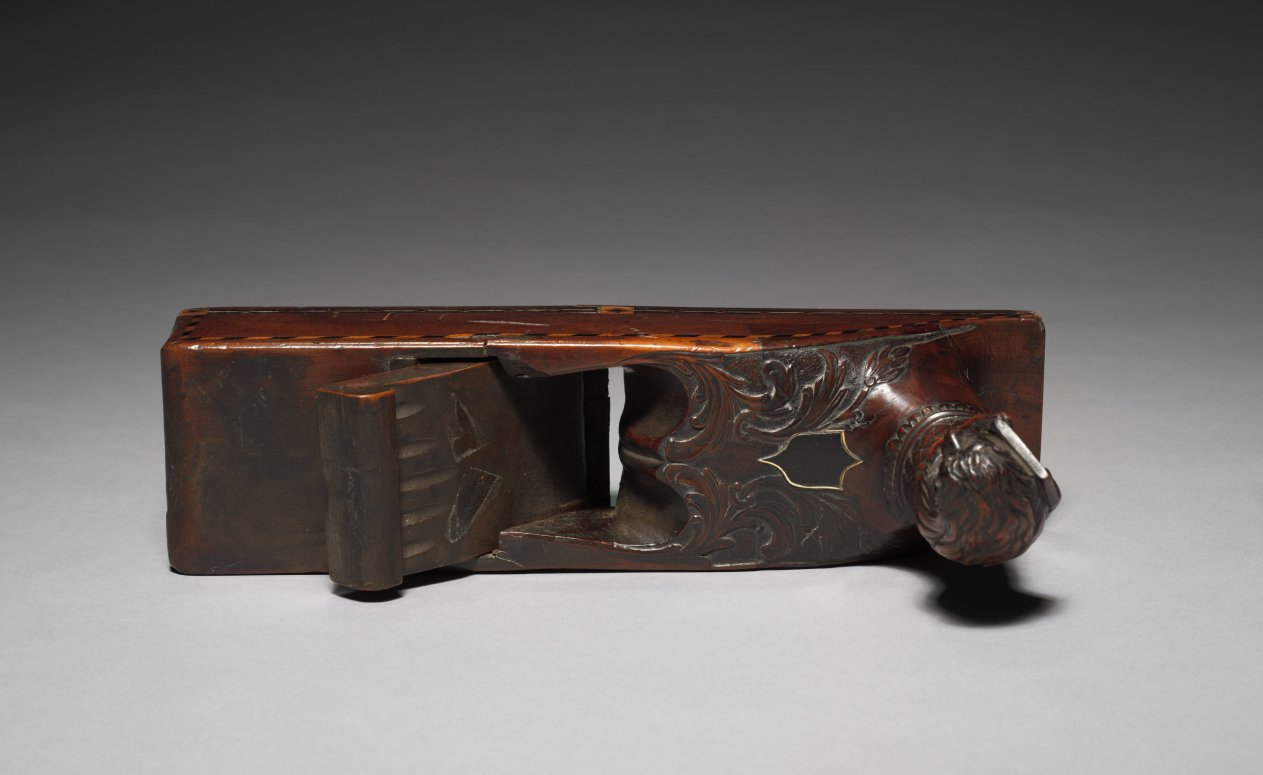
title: Carpenter's Plane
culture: Italy, late 17th century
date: late 1600s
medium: wood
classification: Tool